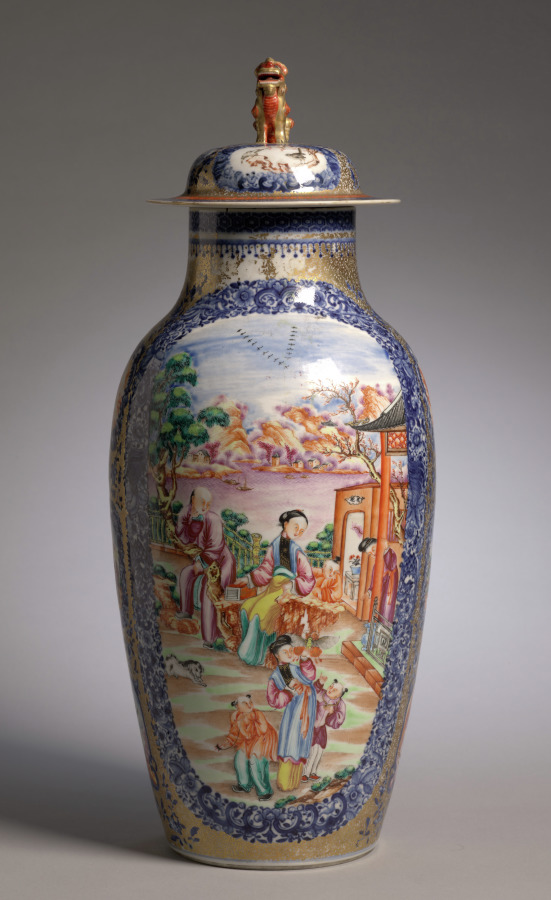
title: Covered Vase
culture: China, Chinese Export, 18th century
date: c. 1770–80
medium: porcelain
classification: Ceramic